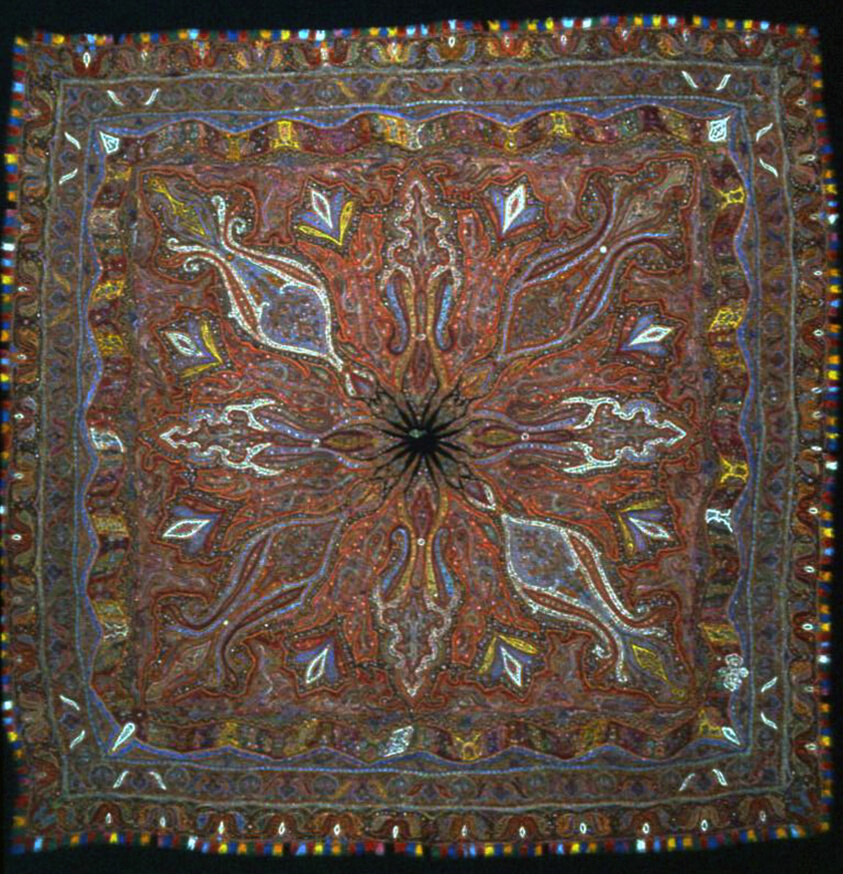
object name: Costume and Accessories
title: Shawl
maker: India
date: 1870s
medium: Wool, patchwork of 2:2 twill weaves; embroidered in back, fishbone, and stem stitches; laid work and couching; main warp fringe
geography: India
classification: textile; needlework (visual works); costume